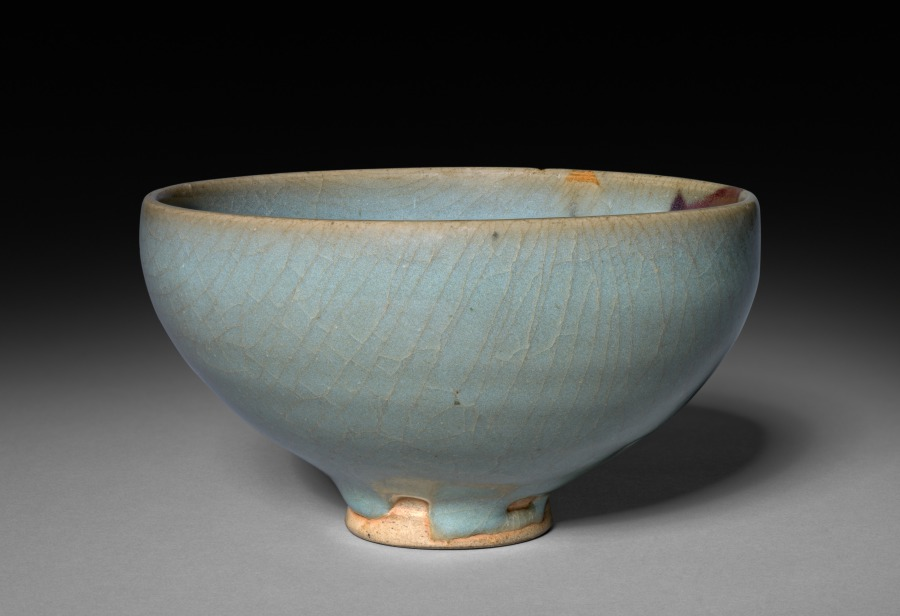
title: Bowl: Jun ware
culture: Northern China, Jin dynasty (1115-1234) - Yuan dynasty (1271-1368)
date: Jin dynasty (1115–1234) - Yuan dynasty (1271–1368)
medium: glazed buff stoneware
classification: Ceramic